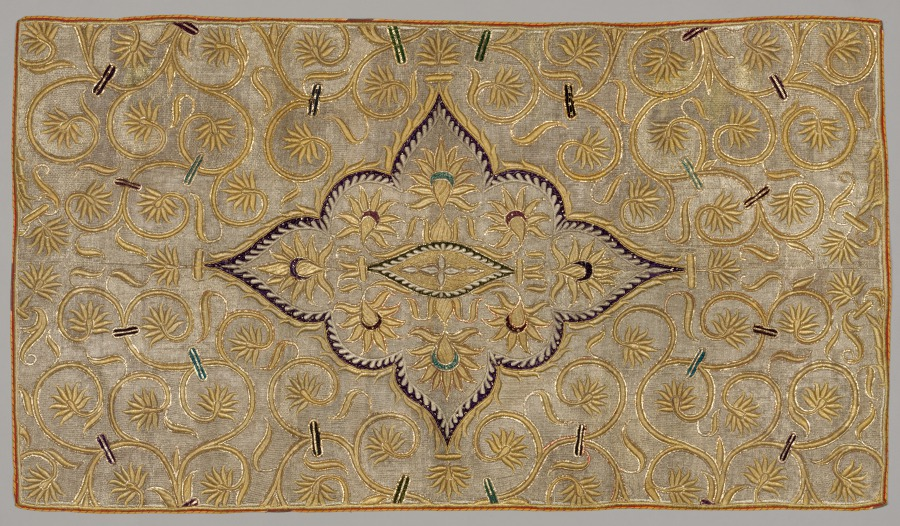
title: Embroidered Cover (?)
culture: India, 18th-19th century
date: 1700s - 1800s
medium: embroidery; silk and metallic threads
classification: Embroidery